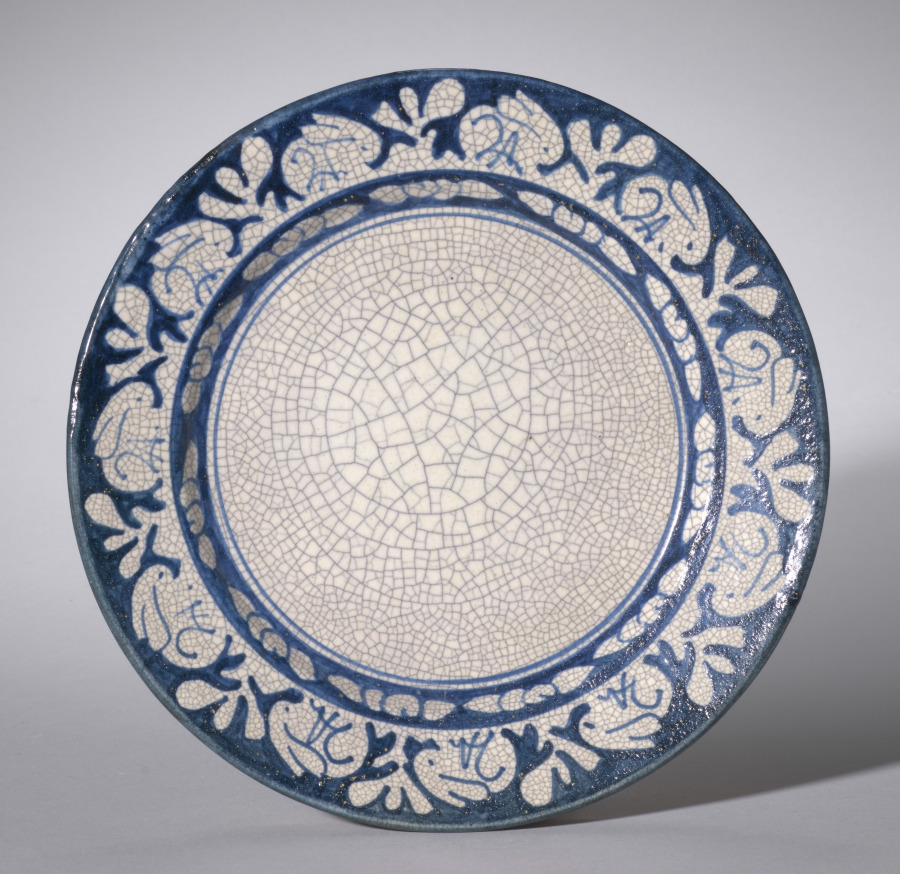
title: Small Plate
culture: America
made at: Dedham Pottery (American)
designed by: Joseph Lindon Smith (American, 1863–1950)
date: early 1900s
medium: earthenware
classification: Ceramic